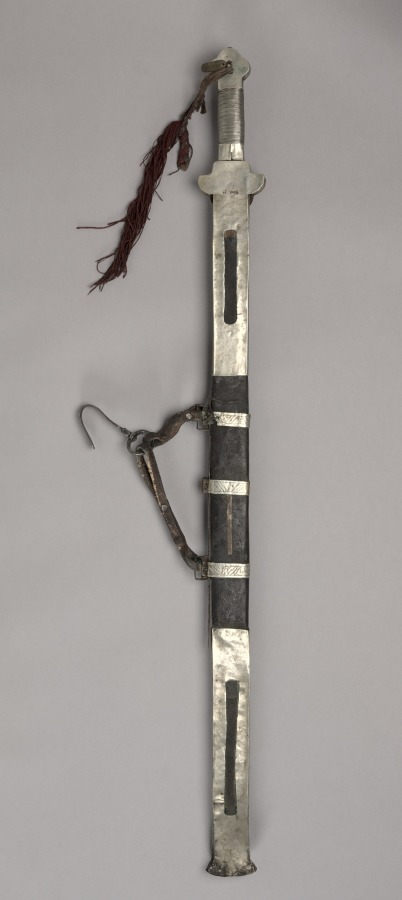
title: Sword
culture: Eastern Tibet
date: 1800s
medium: iron and silver with bone, turquoise, leather and brass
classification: Arms and Armor